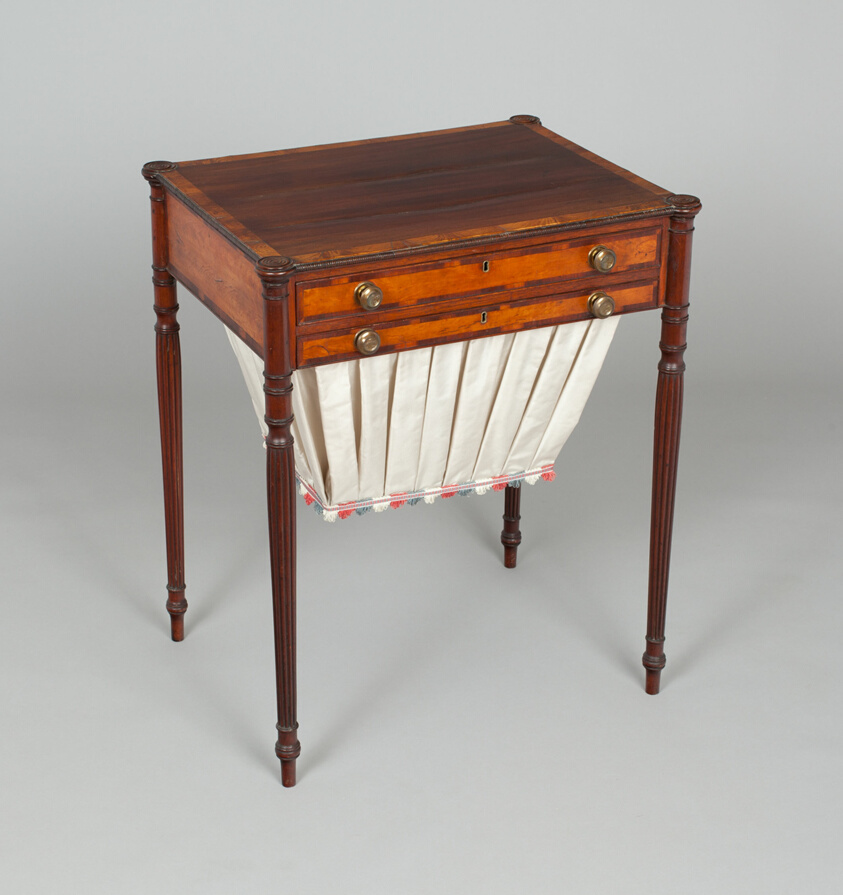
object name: Furniture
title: Work Table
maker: Artist unknown (American, 18th–19th century); Salem, Massachusetts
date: 1800–10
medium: Mahogany, white pine, satinwood veneer, and upholstery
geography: Salem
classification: table; furniture; american decorative arts; american arts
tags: furniture